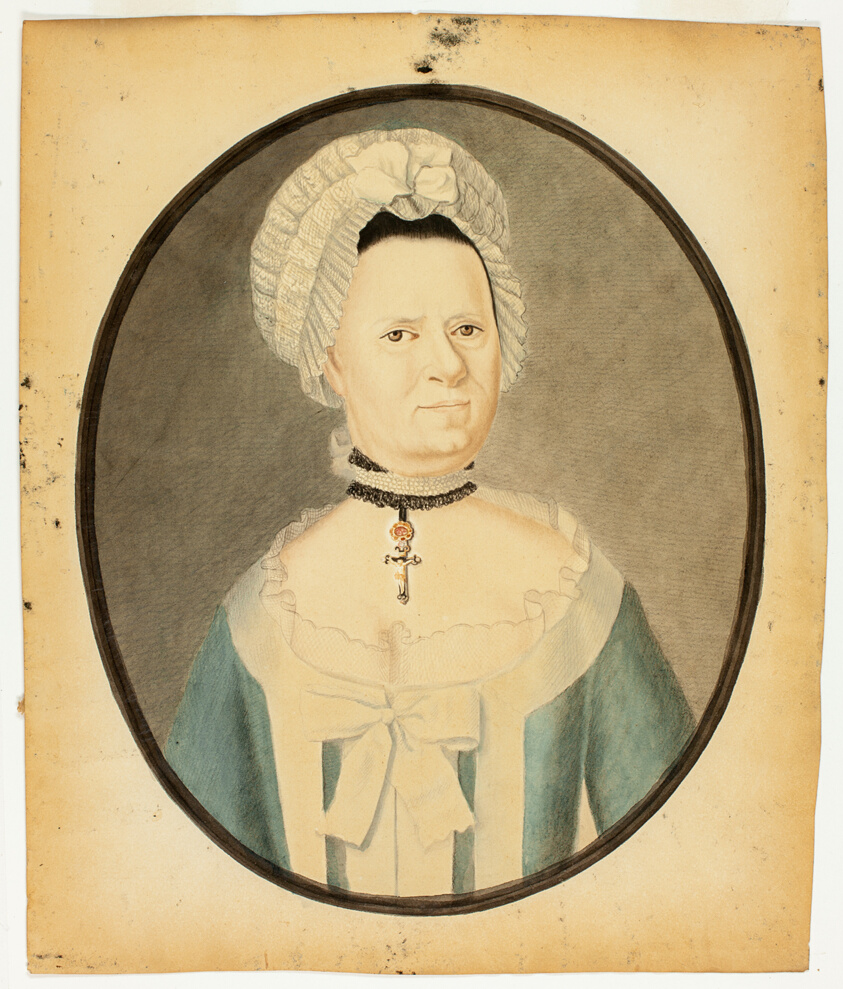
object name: Drawing and Watercolor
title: Portrait of a Woman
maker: Unknown artist; English, 18th century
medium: Watercolor and graphite on paper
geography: England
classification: drawings (visual works); prints and drawing